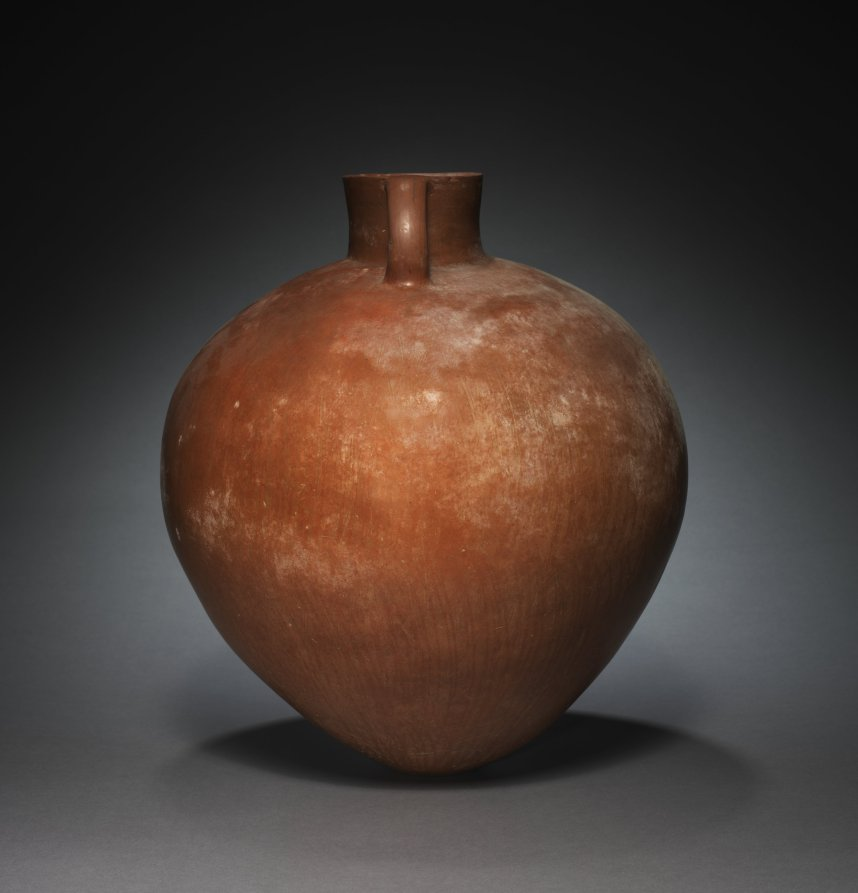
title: Red-Burnished Jug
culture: Iran, Amlash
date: 1000–700 BCE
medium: earthenware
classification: Ceramic